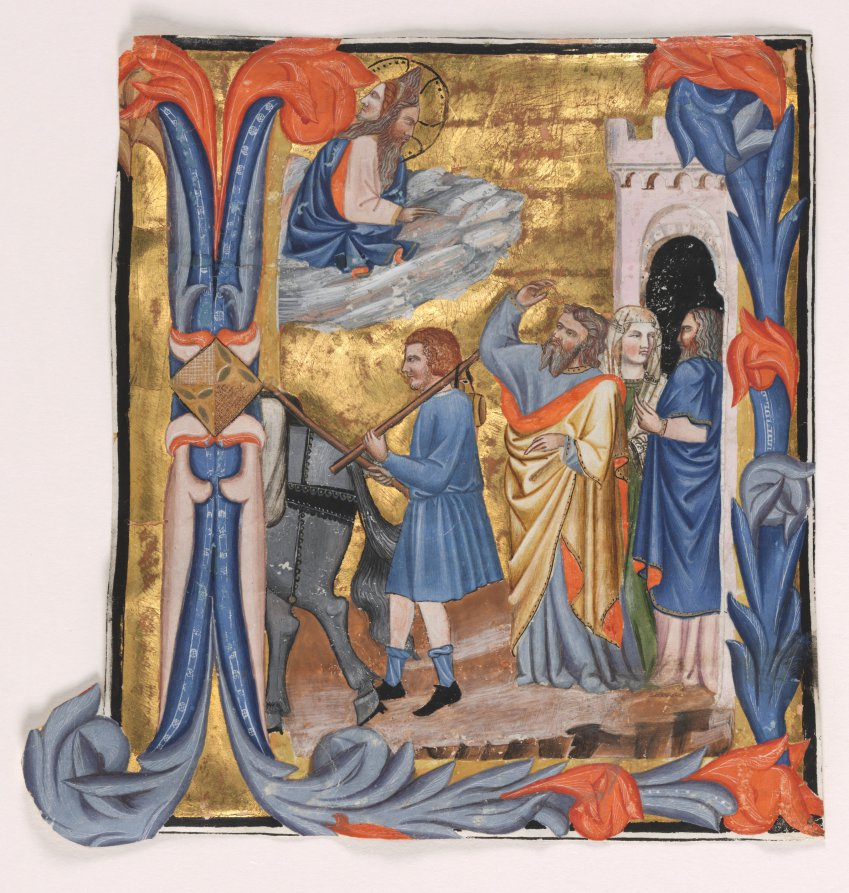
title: Cutting from a Gradual: Initial I with Departure of Tobias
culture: Italy, Florence, 14th century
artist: "Master of Noah's Ark" (Italian)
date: c. 1390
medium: ink, tempera, and gold on vellum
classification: Manuscript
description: The Master of Noah’s Ark was named after an illuminated initial containing that subject now in the Vatican Library. Though he may have worked in Florence, he was unlikely to have been Florentine himself. This rare miniature depicts the story from the apocrypha of Tobias, son of Tobit, a devout Jew in exile who is blind and destitute. Sent out to visit relatives in a distant city in order to find a means of supporting the family, the young Tobias is guided by the Archangel Raphael. This miniature shows the sad and traumatic moment of Tobias’s departure in “continuous narrative” within the same scene (right to left). Within the doorway Tobit and his wife, Anna, are apprehensive. In the center, Tobit prays to God, represented here as the Trinity with two faces and the flame of the Holy Ghost. On the left, Tobias departs with his staff over his shoulder. This initial I would have introduced the text Inclina, Domine, aurem tuam ad me (Turn your ear, O Lord, and hear me). It marks the opening of the 15th Sunday after Pentecost and the beginning of the Introit to the Mass.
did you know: The volume from which this leaf comes is located at the central library of the Augustinian Province of Italy.